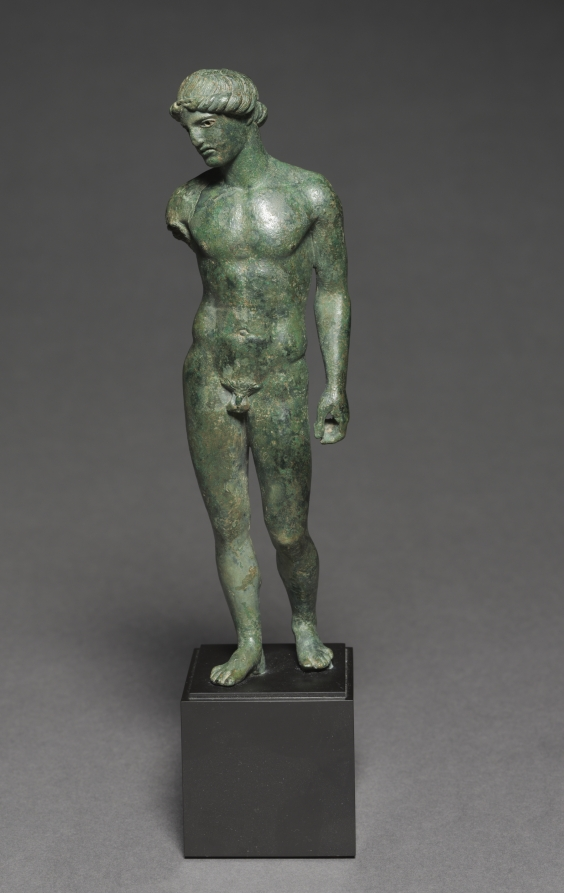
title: Athlete Making an Offering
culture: Greece, probably from workshop of Locri or Tarentum, Classical Period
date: c. 450–425 BCE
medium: bronze (hollow cast)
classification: Sculpture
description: Standing in a classic contrapposto pose, with one leg straight and weight-bearing, the other bent and relaxed, this athlete pauses after victory. He turns his head gently, looking down to make an offering with his lost right hand. At the sites of their victories and in their home cities, champion athletes were often honored with such sculptures, glorifying the strength and beauty of the male form at both small and large scale.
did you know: The missing right arm and hand of this athlete were cast separately and attached.